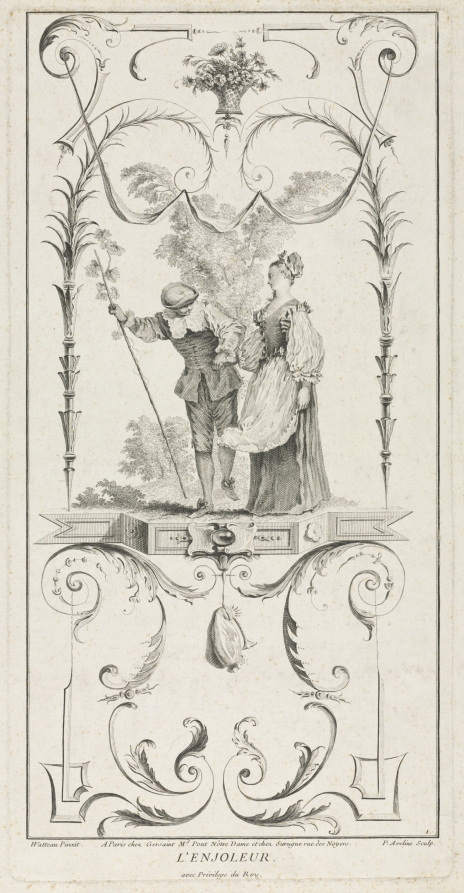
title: The Coaxer, Arabesque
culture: France, 18th century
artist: Pierre Alexandre Aveline (French, 1710–1760)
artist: after Jean-Antoine Watteau (French, 1684–1721)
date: c. 1729–31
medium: engraving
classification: Print